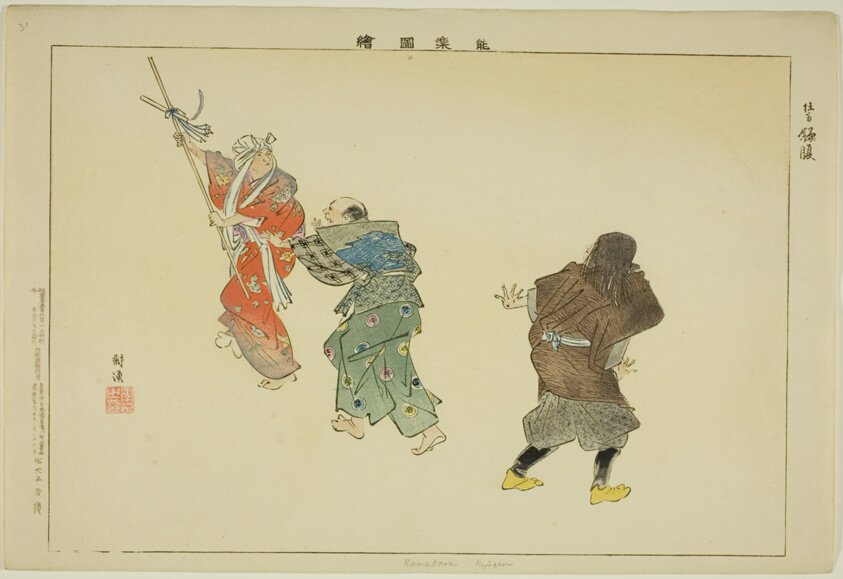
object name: Print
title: Kamabara (Kyogen), from the series "Pictures of No Performances (Nogaku Zue)"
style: Japanese (culture or style)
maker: Tsukioka Kogyo; Japanese, 1869-1927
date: 1898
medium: Color woodblock print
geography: Japan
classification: woodblock print; print; asian art